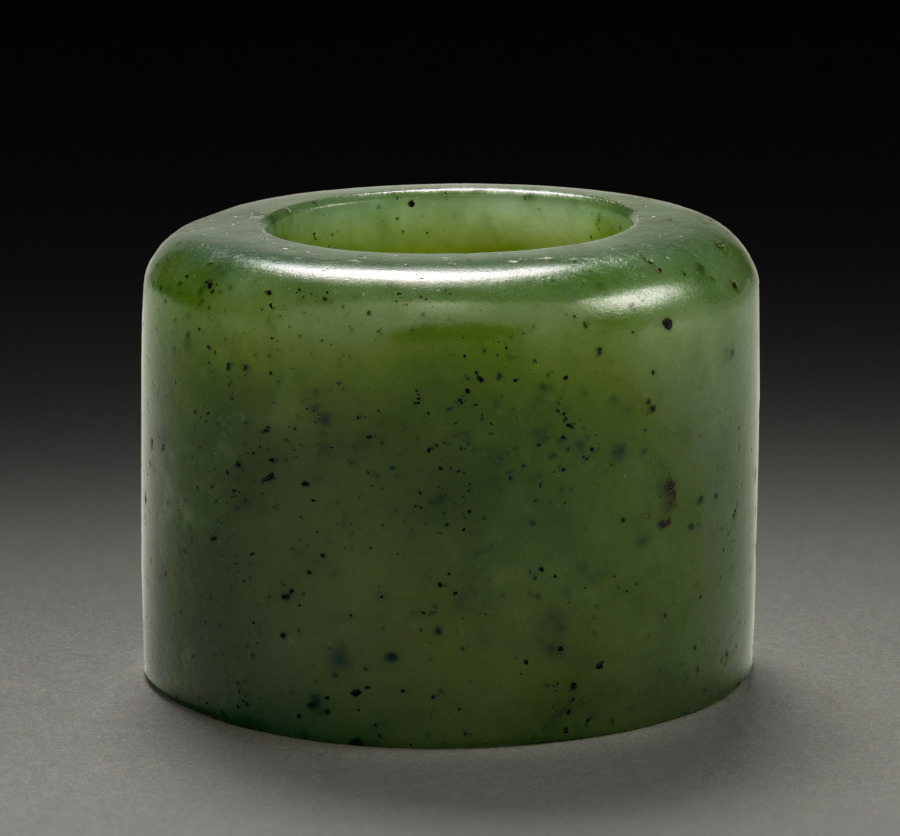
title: Thumb Ring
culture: China, Qing dynasty (1644–1911), Qianlong reign (1736–95)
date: 1736–95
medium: spinach green jade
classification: Jade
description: Jade rings were worn by men on the thumb of the right hand to assist with holding and pulling the string of the archer’s bow. However, thumb rings were also fashionable accessories for civil officials in the late Qing dynasty.